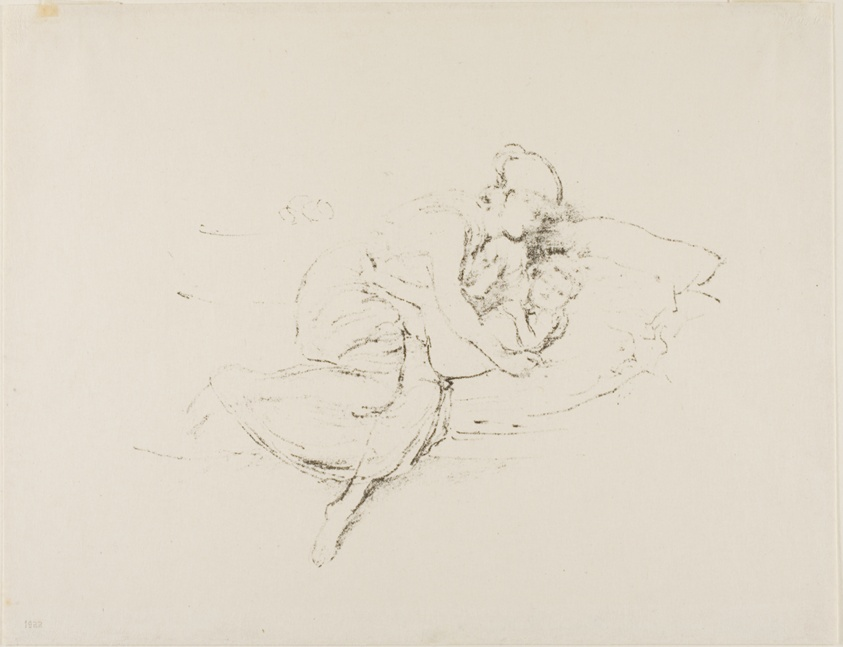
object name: Print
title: Mother and Child, No. 3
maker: James McNeill Whistler (American, 1834-1903)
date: 1891/95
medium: Transfer lithograph in black on cream Japanese paper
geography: United States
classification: transfer lithograph; lithograph; print; prints and drawing; paper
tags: mothers, children